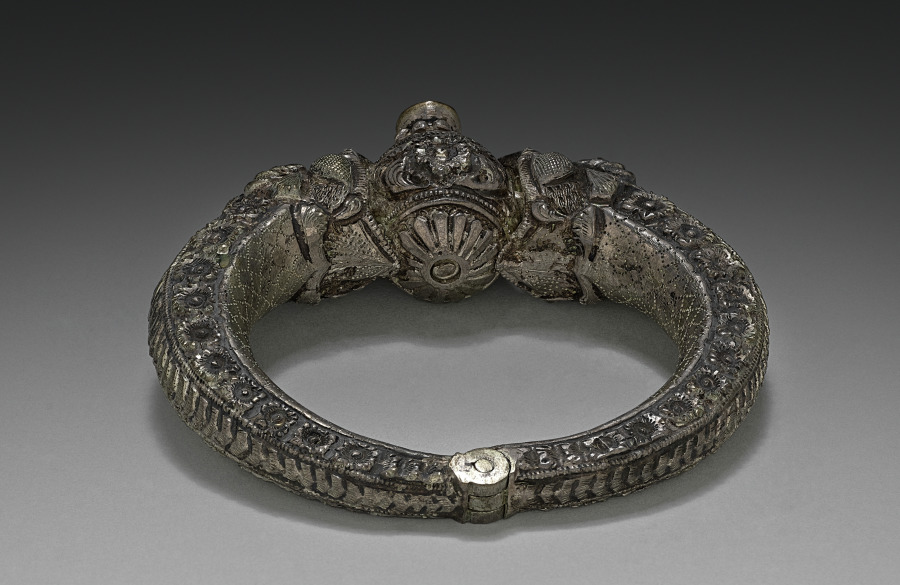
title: Bracelet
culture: Burma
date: 1800s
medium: silver gilt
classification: Jewelry